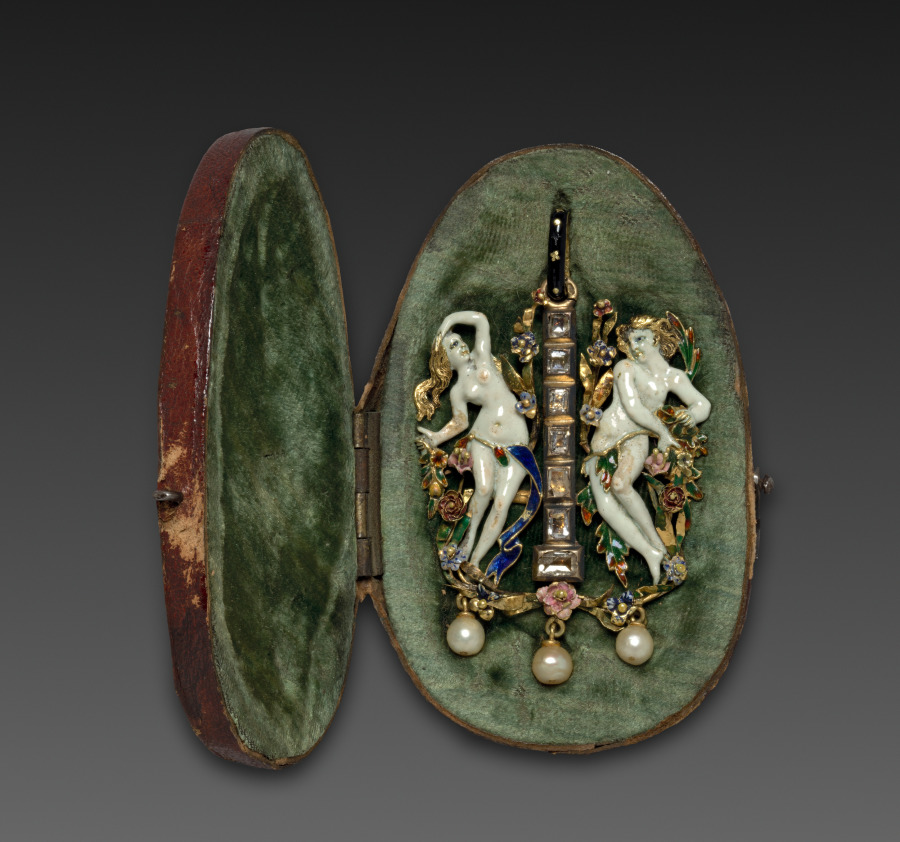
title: Pendant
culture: France, late 19th century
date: 1870–1890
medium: enameled figures surrounded by colored enameled flowers, gems and pearls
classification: Jewelry